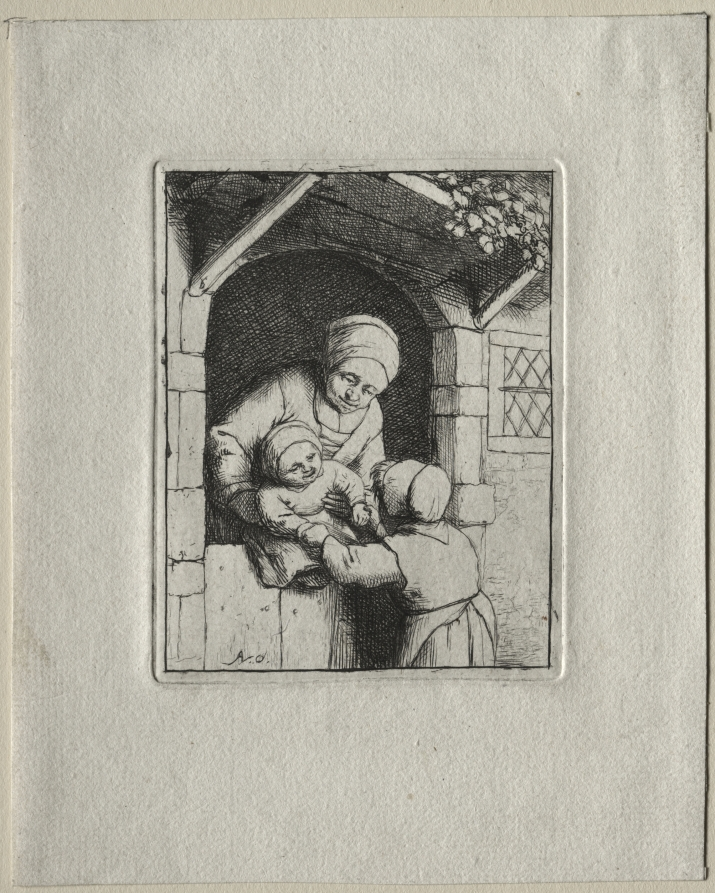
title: Mother and Two Children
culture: Netherlands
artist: Adriaen van Ostade (Dutch, 1610–1684)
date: c. 1671–79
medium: etching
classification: Print